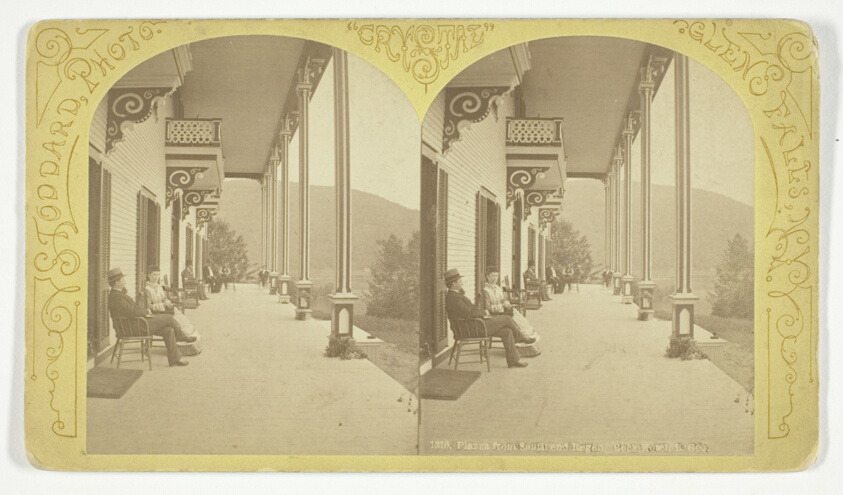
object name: Photograph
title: Plazza from South end Rogen. Rock Hotel, IL Geo. , No. 1316 from the series "Crystal"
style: 19th century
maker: Seneca Ray Stoddard (American, 1844-1917)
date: 1870/76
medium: Albumen print, stereo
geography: Glens Falls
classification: photography; photograph